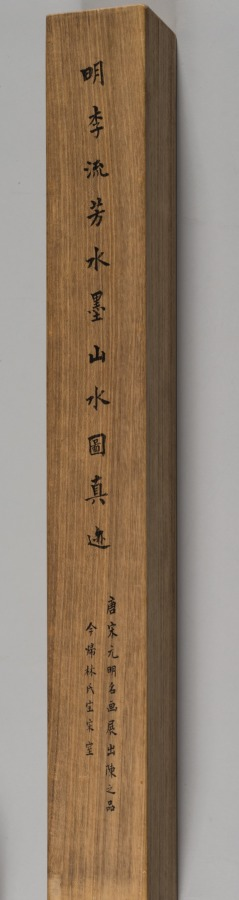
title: Playing the "Hand Game"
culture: Japan, Edo period (1615–1868)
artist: Hasegawa Yasumasa (Japanese)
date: c. 1760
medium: hanging scroll; ink and color on paper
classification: Painting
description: This scene depicts three people playing a game in which three players make hand gestures simultaneously. The relationship among the gestures determines the winner. Known as hand games, during the eighteenth century they were popular in Japan among courtesans. In this version, the contestants use both hands, indicating a special variation such as the fox hand game, which features gestures for a fox, a village leader, and a hunter.